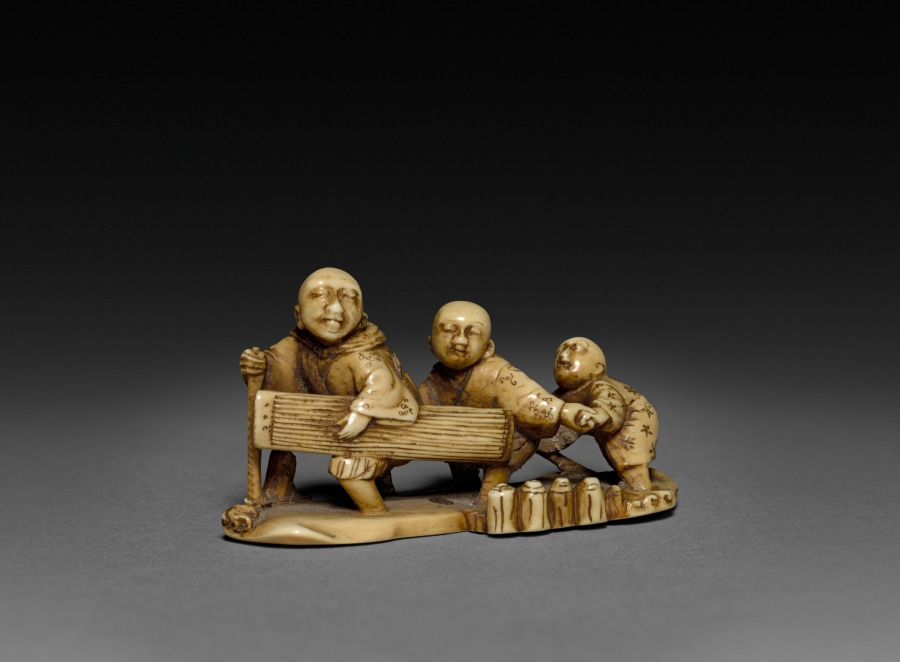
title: Three Figures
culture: Japan, Meiji period (1868–1912)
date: early 1900s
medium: ivory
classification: Ivory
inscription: 古川